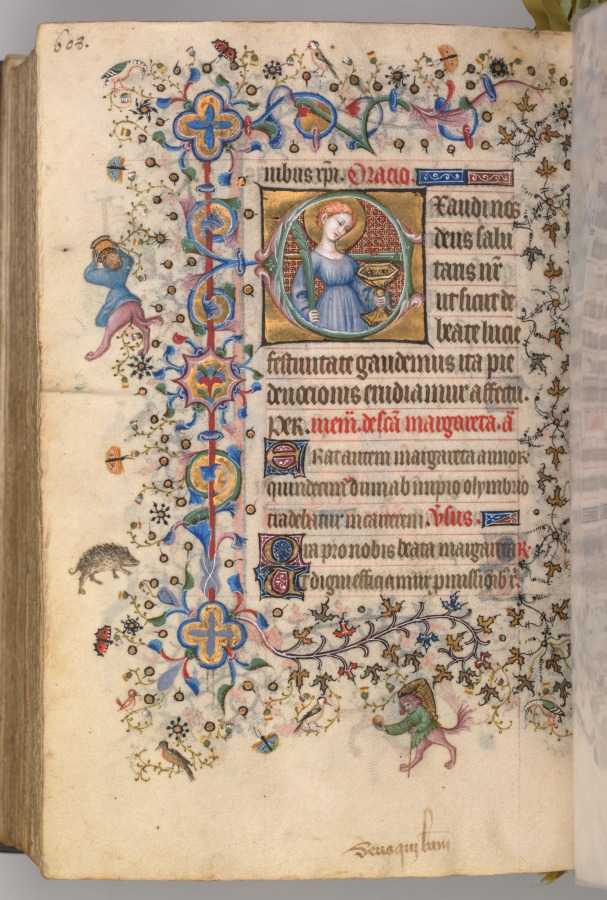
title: Hours of Charles the Noble, King of Navarre (1361-1425): fol. 298v, St. Lucy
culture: France, Paris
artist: Master of the Brussels Initials and Associates (French)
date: c. 1405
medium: ink, tempera, and gold on vellum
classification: Bound Volume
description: This precious volume was obviously highly prized by its owner, the French-born King of Navarre, who had his coat of arms painted on no less than twenty folios. Rather than directly commissioning this manuscript from a specific workshop, it seems that Charles the Noble acquired his book of hours -- perhaps ready-made for the luxury market -- while on a trip to Paris in 1404-05. A collaborative effort, six painting styles are evidenced within the pages of this codex, those of two Italians, two Frenchmen, and two Netherlanders. The painter who was responsible for the planning and decoration of the book, and who produced seventeen of the large miniatures, was a Bolognese artist known as the Master of the Brussels Initials. His principal assistant, responsible for most of the borders, was a Florentine who signed his name "Zecho" da Firenze on folio 208 verso.